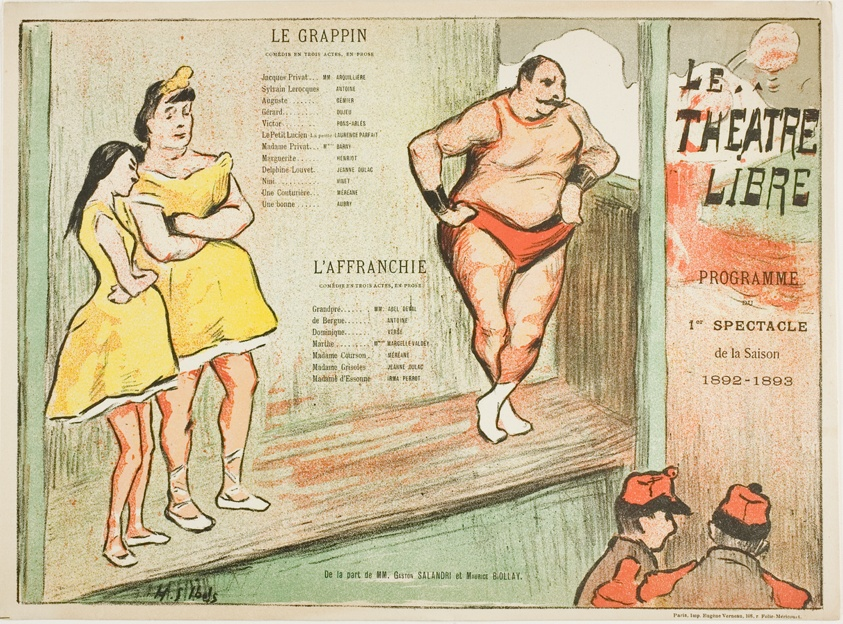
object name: Print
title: First Performance: Le Grappin, l'Affranchie, for Le Théatre Libre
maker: Henri-Gabriel Ibels (French, 1867-1936); printed by Imprimerie Eugène Verneau (French, 19th century-1906)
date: 1892–93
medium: Color lithograph on cream wove paper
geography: France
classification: lithograph; print; prints and drawing